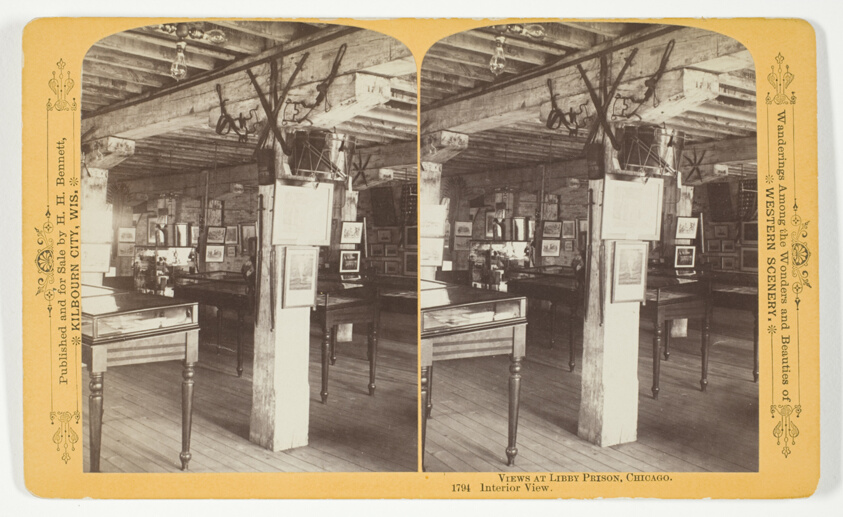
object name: Photograph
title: Interior View, Libby Prison, from the series "Views at Libby Prison, Chicago"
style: 19th century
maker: Henry Hamilton Bennett (American, born Canada, 1843-1908)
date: 1893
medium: Albumen print, stereo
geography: Chicago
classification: photography; photograph; albumen silver print; stereograph (albumen)